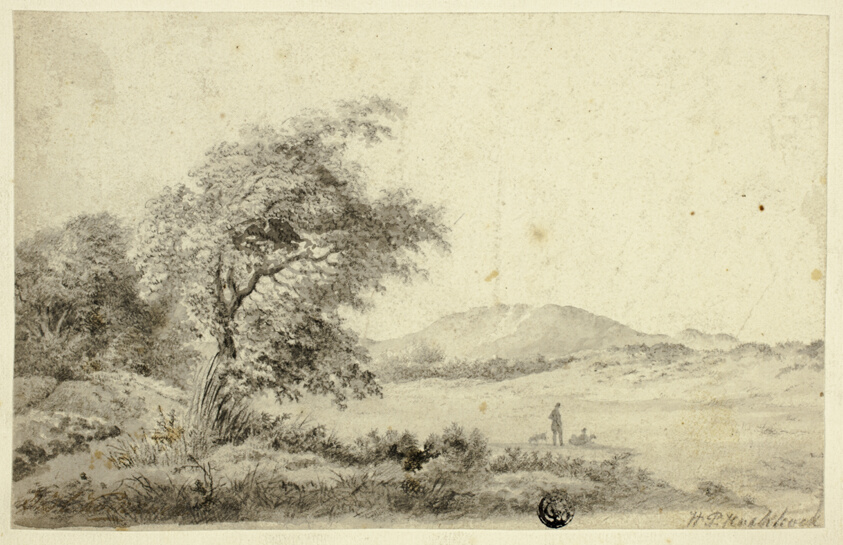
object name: Drawing and Watercolor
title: Landscape with Couple and Dog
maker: Hendrik Pieter Koekkoek (Dutch, 1843-c. 1890)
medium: Black chalk, with brush and gray wash, on ivory wove paper, laid down on ivory wove paper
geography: Holland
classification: ink or chalk wash; drawings (visual works); prints and drawing